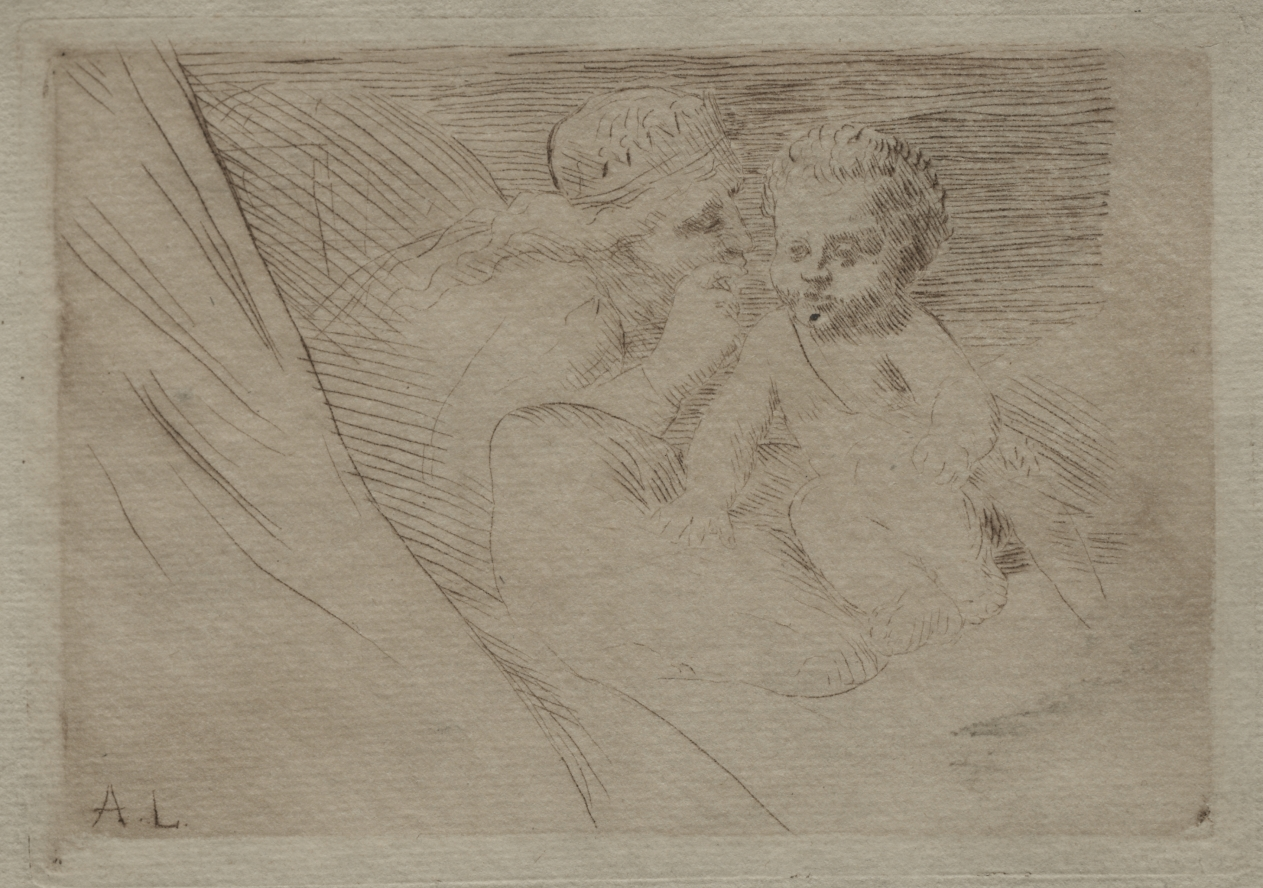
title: Mab and Cupid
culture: France, 19th century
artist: Alphonse Legros (French, 1837–1911)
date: 1880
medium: drypoint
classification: Print